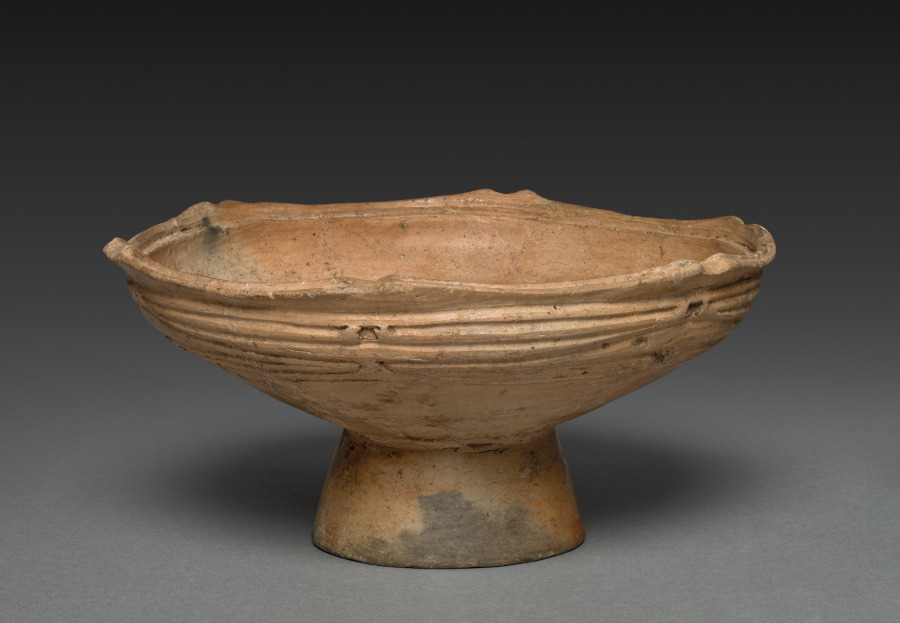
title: Pedestalled Dish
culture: Japan, Jōmon period (c. 10,500–300 BCE)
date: c. 1000–500 BCE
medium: burnished earthenware with carved and impressed decoration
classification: Ceramic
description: The Jomon period (10,500-300 BC) marks the beginning of the Japanese ceramic tradition, one of the most vibrant in world history. Major features such as an emphasis on asymmetrical silhouettes, great attention to surface texture, technological simplicity, and ambivalence to bright color already appear in this era. Late Jomon vessels are typically formed of a dense clay paste, and during this period, smaller serving vessels appear, in contrast to earlier deep storage or cooking vessel shapes. New types of surface decoration-carved rather than impressed into the clay body-herald the arrival of a distinctive aesthetic. The attachment of the pedestal to this shallow bowl, as well as the vessel's rather thin walls, also identify a new stage in ceramic production in Japan.